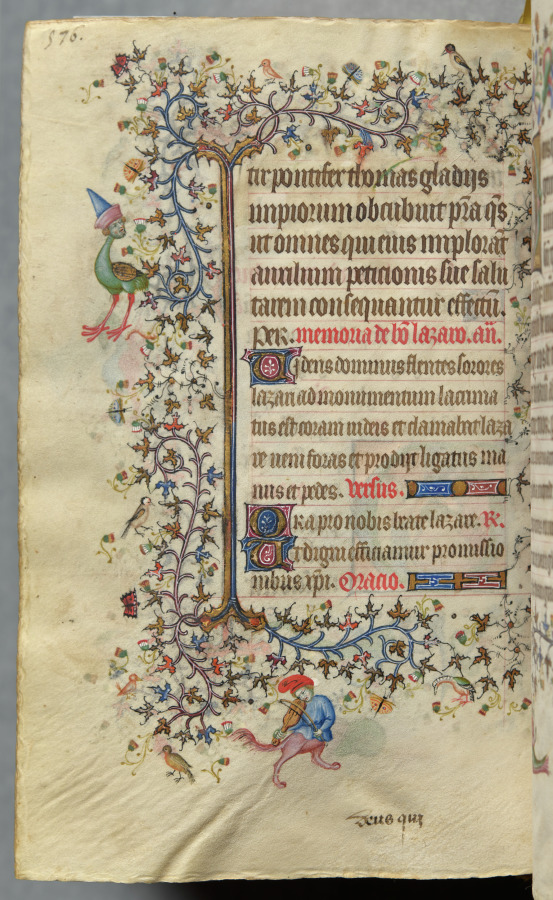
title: Hours of Charles the Noble, King of Navarre (1361-1425): fol. 282v, Text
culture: France, Paris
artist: Master of the Brussels Initials and Associates (French)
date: c. 1405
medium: ink, tempera, and gold on vellum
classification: Bound Volume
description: This precious volume was obviously highly prized by its owner, the French-born King of Navarre, who had his coat of arms painted on no less than twenty folios. Rather than directly commissioning this manuscript from a specific workshop, it seems that Charles the Noble acquired his book of hours -- perhaps ready-made for the luxury market -- while on a trip to Paris in 1404-05. A collaborative effort, six painting styles are evidenced within the pages of this codex, those of two Italians, two Frenchmen, and two Netherlanders. The painter who was responsible for the planning and decoration of the book, and who produced seventeen of the large miniatures, was a Bolognese artist known as the Master of the Brussels Initials. His principal assistant, responsible for most of the borders, was a Florentine who signed his name "Zecho" da Firenze on folio 208 verso.